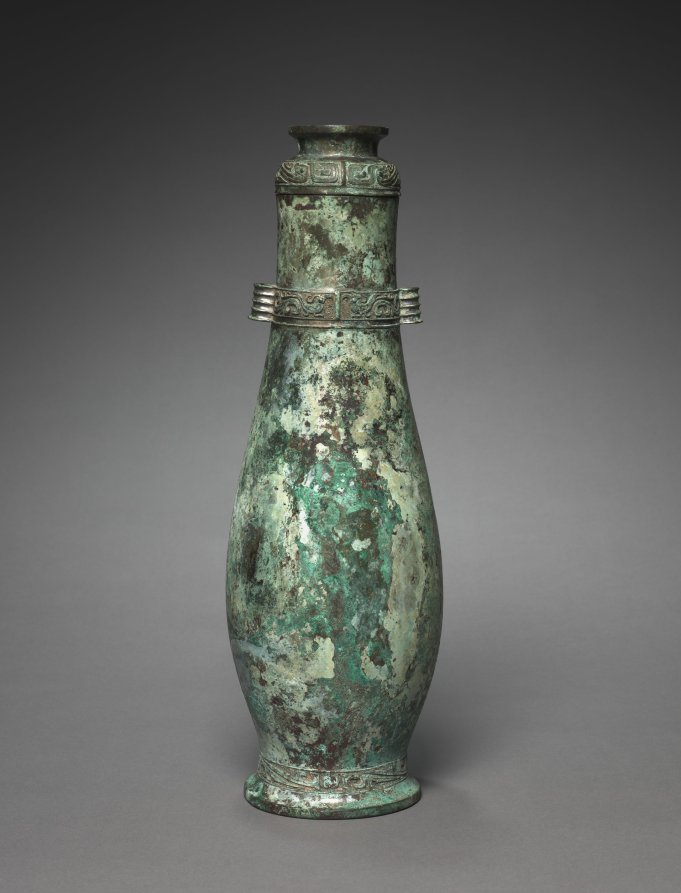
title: Wine Vessel (Hu)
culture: China, Western Zhou dynasty (c. 1046–771 BCE)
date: c. 1000–900 BCE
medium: bronze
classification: Metalwork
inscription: inscription inside top (cup): 事从作壺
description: This tall, slender bronze wine vessel, called a hu, has three bands of ornamentation: one above the foot, one around the neck, and one on the cover. Stylized birds or phoenixes are in the band around the neck, while the band on the cover and foot feature geometric dragons. The dragon and the phoenix may represent yin and yang and would be equally appropriate on a bronze of either secular or religious purposes. When inverted, the cover forms a cup. It likely held liquids like wine at festive banquets or religious ceremonies. The cylindrical "handles" at the neck band suggest that the vessel was carried by a cord.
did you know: This vessel was cast by the cire perdue, or lost wax, process.